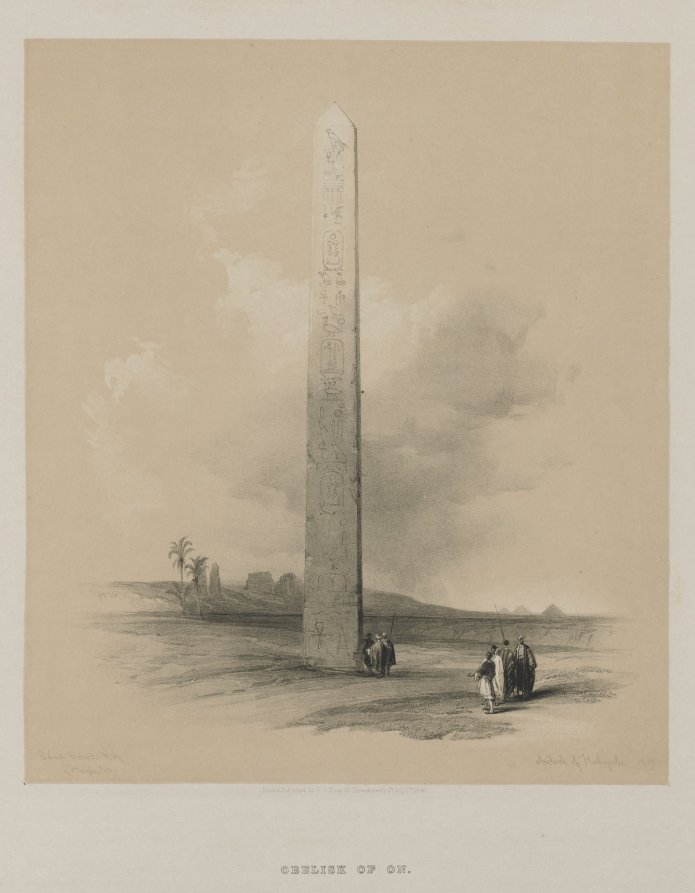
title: Egypt and Nubia, Volume II: Obelisk of Heliopolis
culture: England, 19th century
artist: Louis Haghe (British, 1806–1885)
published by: F. G. Moon, 20 Threadneedle Street, London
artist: after David Roberts (Scottish, 1796–1864)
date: 1848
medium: color lithograph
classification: Print